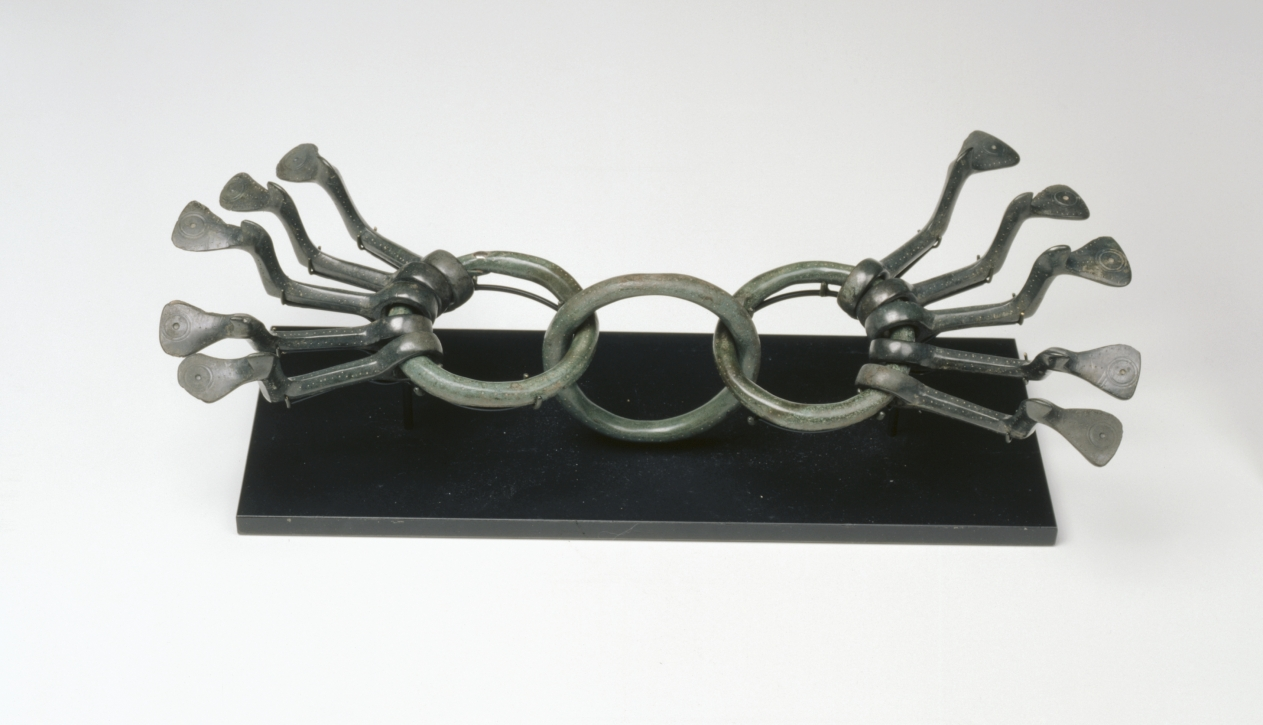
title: Cauldron Ornament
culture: Central Europe, Bronze Age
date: c. 1200 BCE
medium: bronze with iron rivets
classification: Metalwork